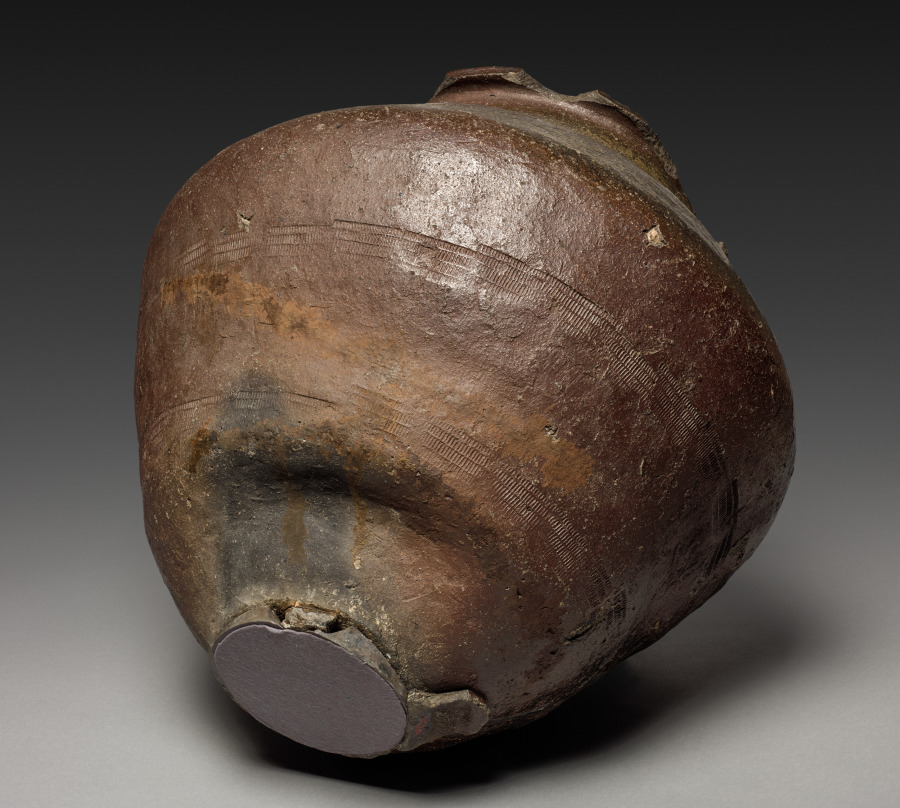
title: Storage Jar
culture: Japan, Nanbokuchō period (1336–92)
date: 1350–99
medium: Stoneware with natural ash glaze and impressed designs (Tokoname ware)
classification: Ceramic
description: This storage jar was made by piling coils of clay atop one another, smoothing the inner and outer surfaces, and allowing the clay to dry before adding another section of the form. The wide rim and mouth were then added using a potter’s wheel. Because of its small base, the vessel could stand safely on a narrow step on the steep slope of a rising kiln floor. Such kilns were built into the side of a hill and used wood for firing. The natural ash glazes took about a week to 10 days to form.